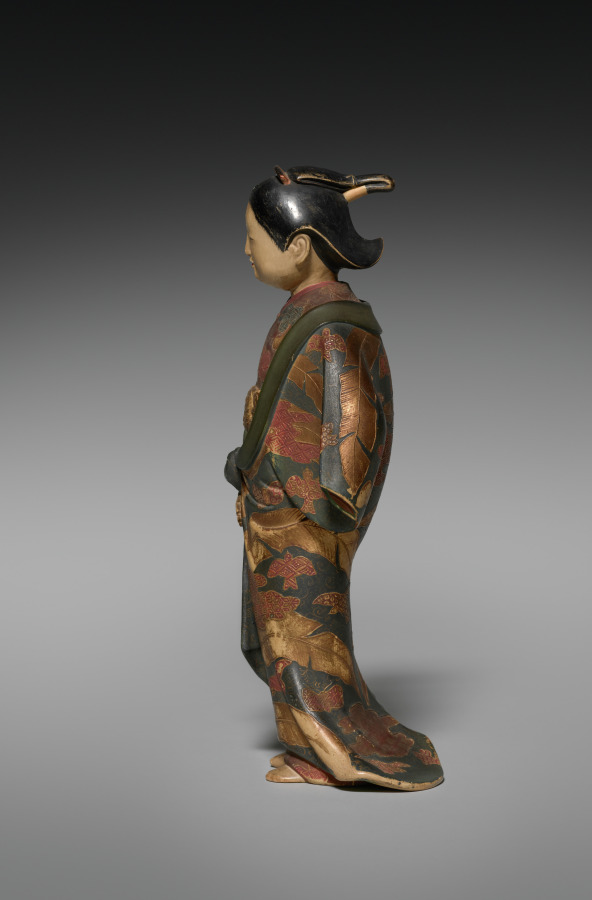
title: Saga Doll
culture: Japan, Edo period (1615–1868)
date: 1688–1703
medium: lacquered wood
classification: Sculpture